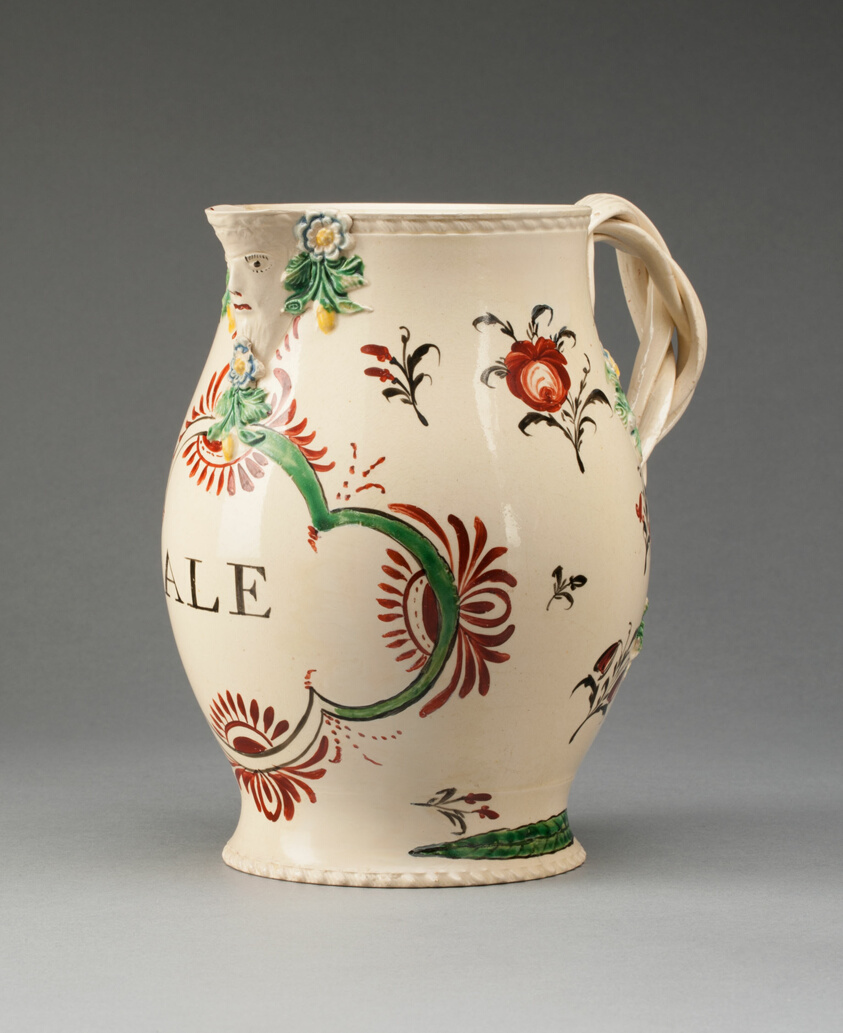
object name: Ceramics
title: Ale Jug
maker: Staffordshire, England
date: c. 1780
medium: Lead-glazed earthenware (creamware) and polychrome enamels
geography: Staffordshire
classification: earthenware; creamware; lead-glazed earthenware; ceramics; european decorative arts